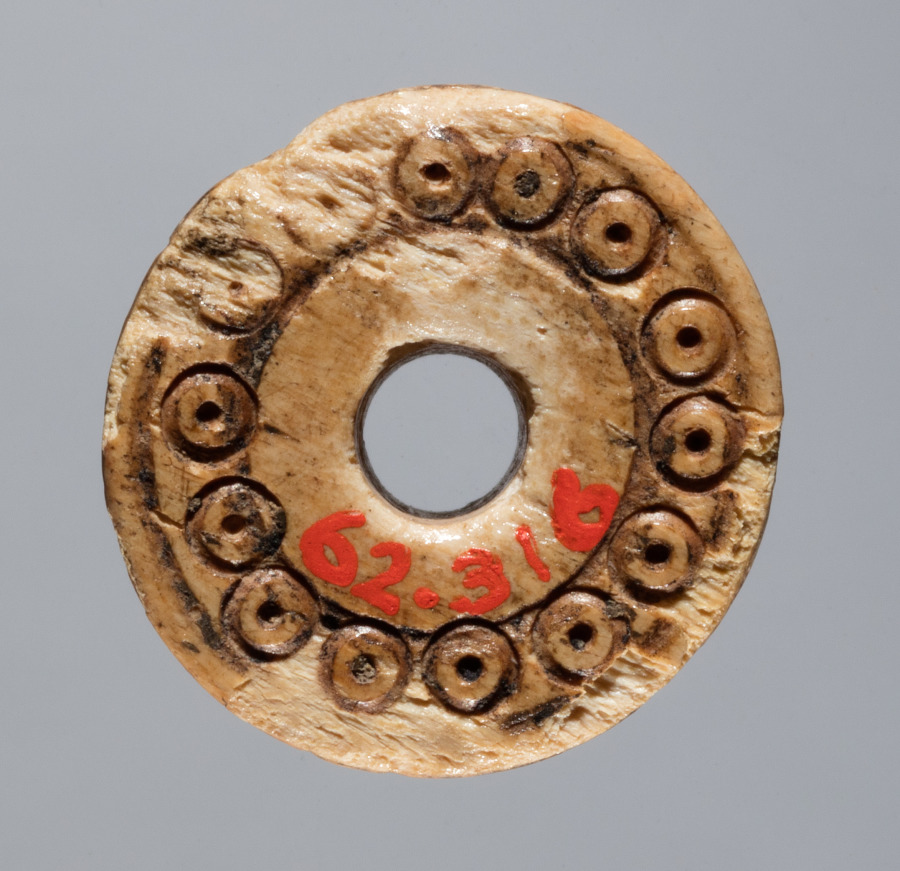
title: Spindle Whorl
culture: Iran, early Islamic period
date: 700s - 900s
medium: bone, incised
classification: Spindle Whorl